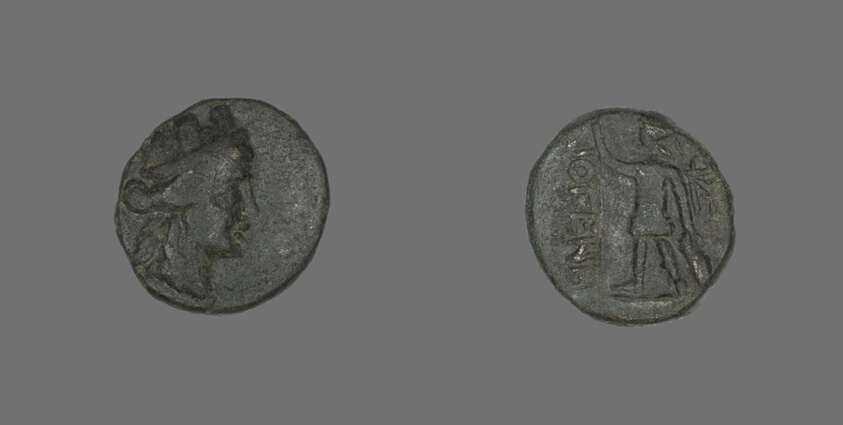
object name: Coin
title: Coin Depicting the Amazon Cyme or the Goddess Tyche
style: roman (ancient, style or period), ancient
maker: Roman, minted in Cyme, Aeolis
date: 31 BCE-476 CE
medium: Bronze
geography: Rome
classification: coin; ancient art